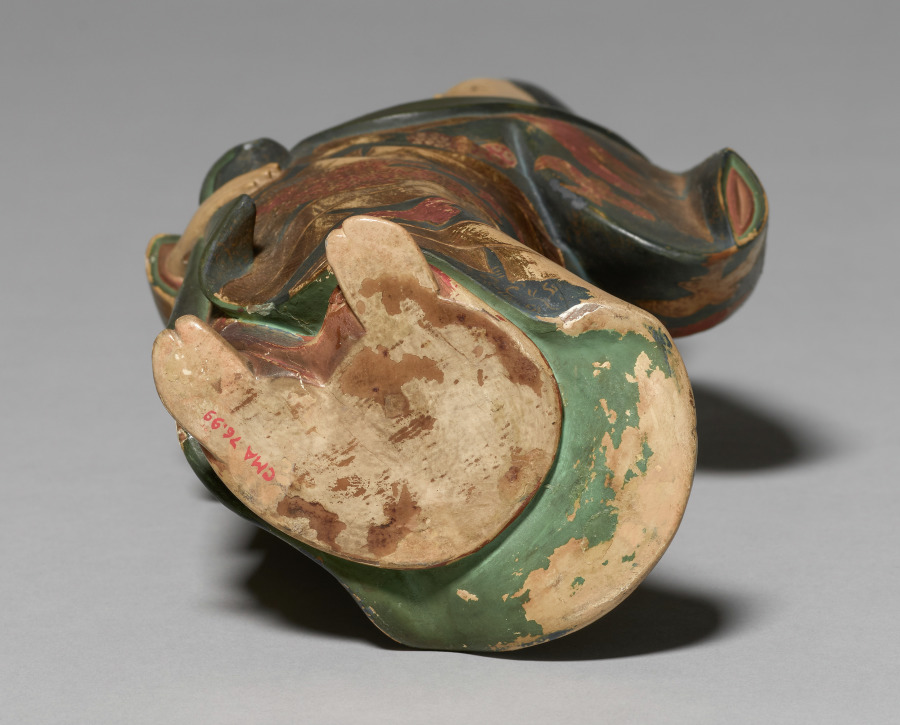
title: Saga Doll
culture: Japan, Edo period (1615–1868)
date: 1688–1703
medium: lacquered wood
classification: Sculpture